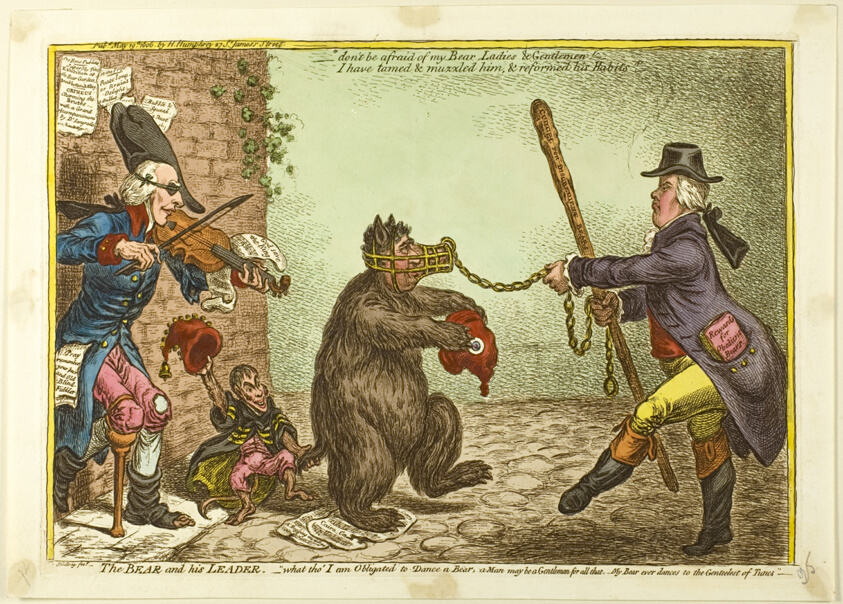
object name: Print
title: The Bear and His Leader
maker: James Gillray (English, 1756-1815); published by Hannah Humphrey (English, c. 1745-1818)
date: published May 19, 1806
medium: Hand-colored etching with aquatint on paper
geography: England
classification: etching; print; prints and drawing